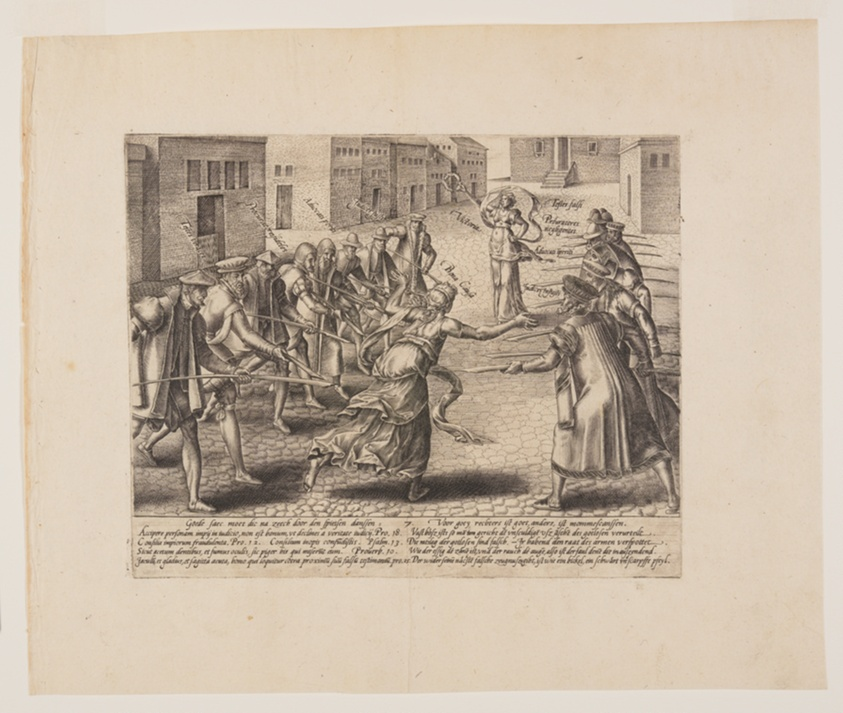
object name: Print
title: Imperiled Litigation, from Litis Abusus (The Abuses of the Law)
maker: Hendrick Goltzius (Dutch, 1558–1617)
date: c. 1576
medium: Engraving on ivory laid paper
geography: Netherlands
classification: print; paper; prints and drawing; engraving